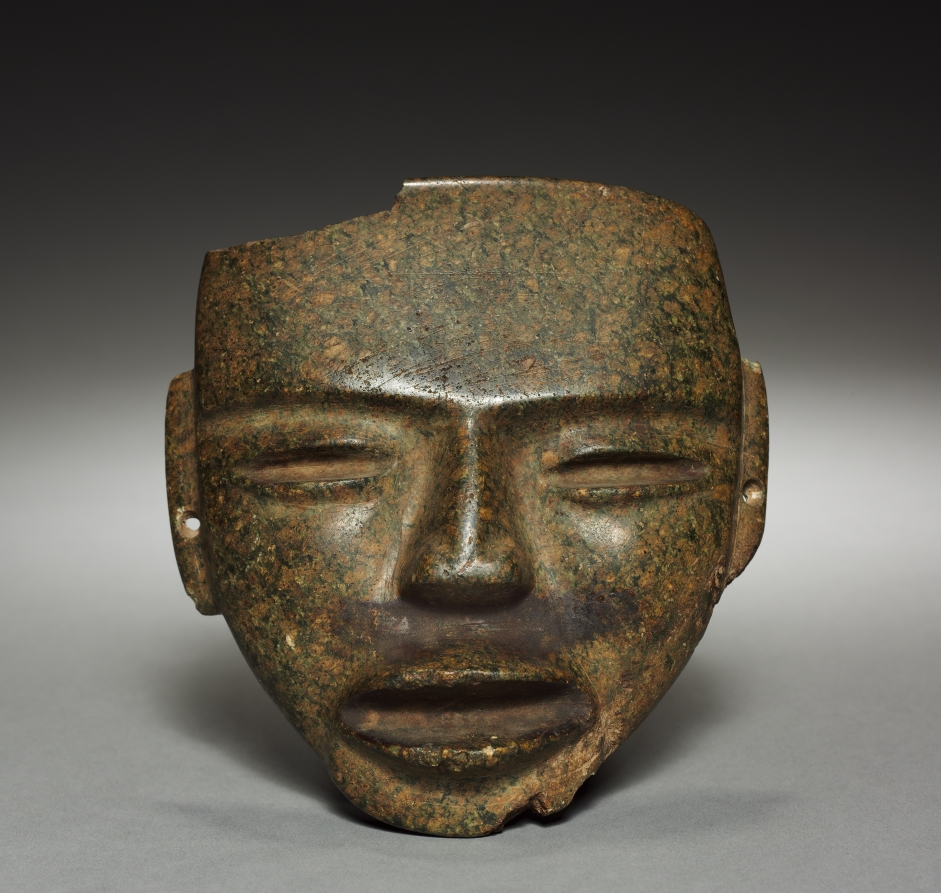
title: Mask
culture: Central Mexico, Teotihuacán, Guerrero(?), Classic period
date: 1–550 CE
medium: green stone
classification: Stone